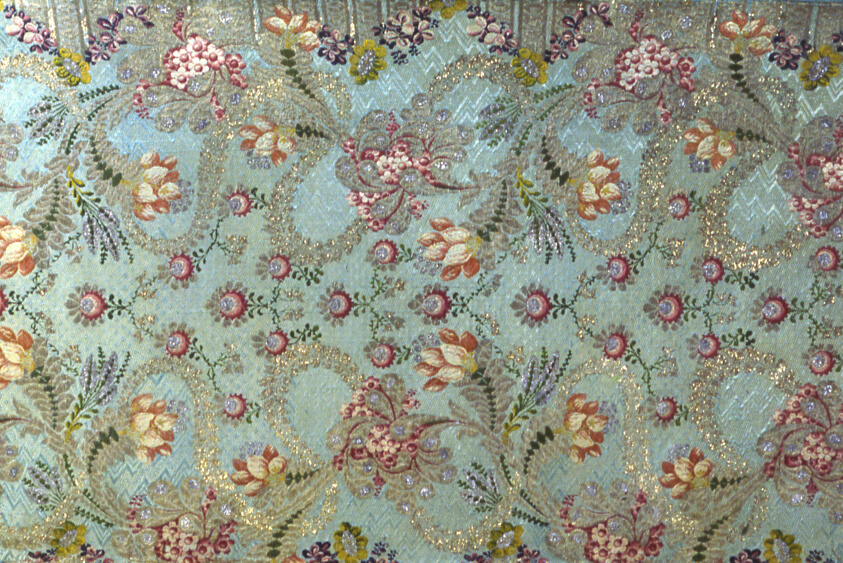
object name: Textile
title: Panel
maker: France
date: 1725/50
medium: Silk, compound weave; brocaded in silk and gold and silver metal threads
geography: France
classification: textile; weaving